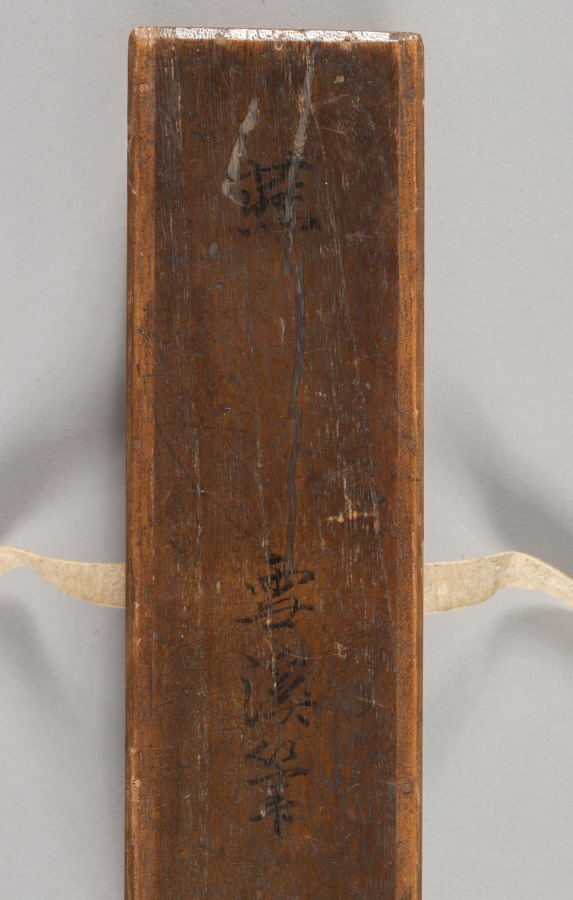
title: Swallows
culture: Japan, Edo period (1615–1868)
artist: Yamaguchi Sekkei (Japanese, 1644–1732)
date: late 1600s–early 1700s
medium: hanging scroll; ink and color on paper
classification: Painting